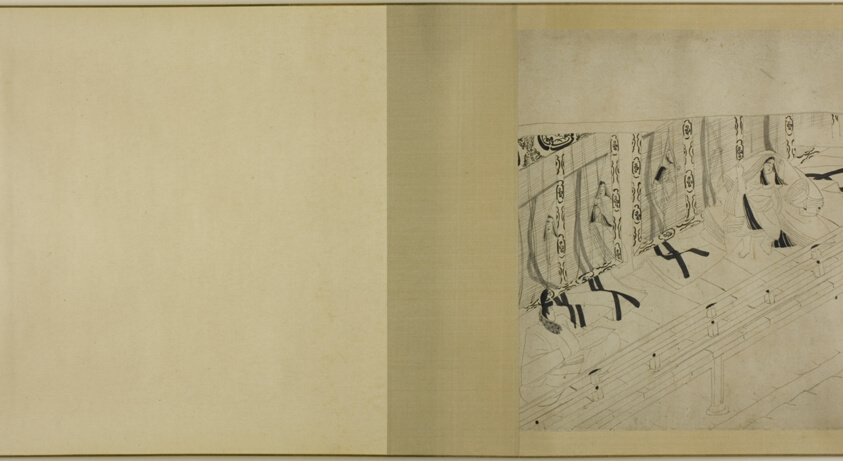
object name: Book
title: The Story of Sugawara no Michizane (Kitano Tenjin Emaki Dankan)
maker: Unknown Artist (Japanese, active in 14th century)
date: 14th century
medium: Handscroll; ink on paper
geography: Japan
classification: handscroll; painting; asian art